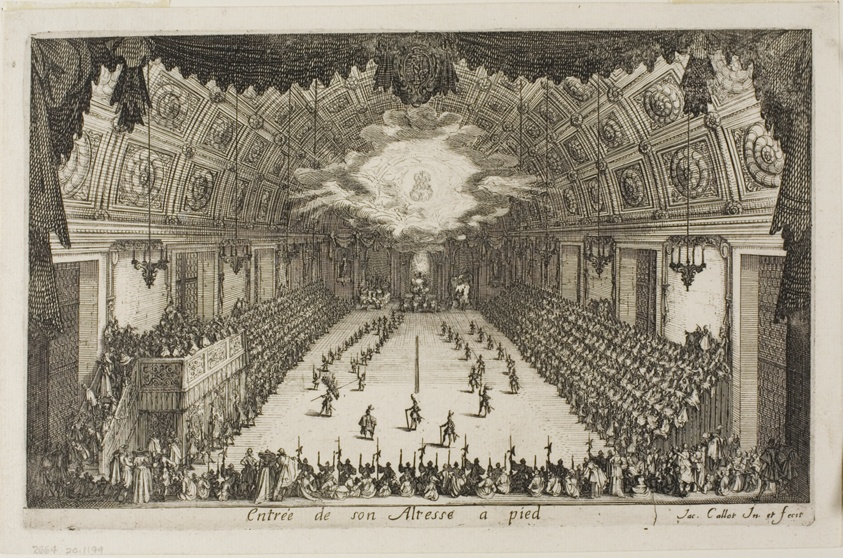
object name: Print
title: Entry of His Highness on Foot, from The Combat at the Barrier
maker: Jacques Callot (French, 1592-1635)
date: 1627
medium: Etching on paper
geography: France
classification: etching; print; prints and drawing